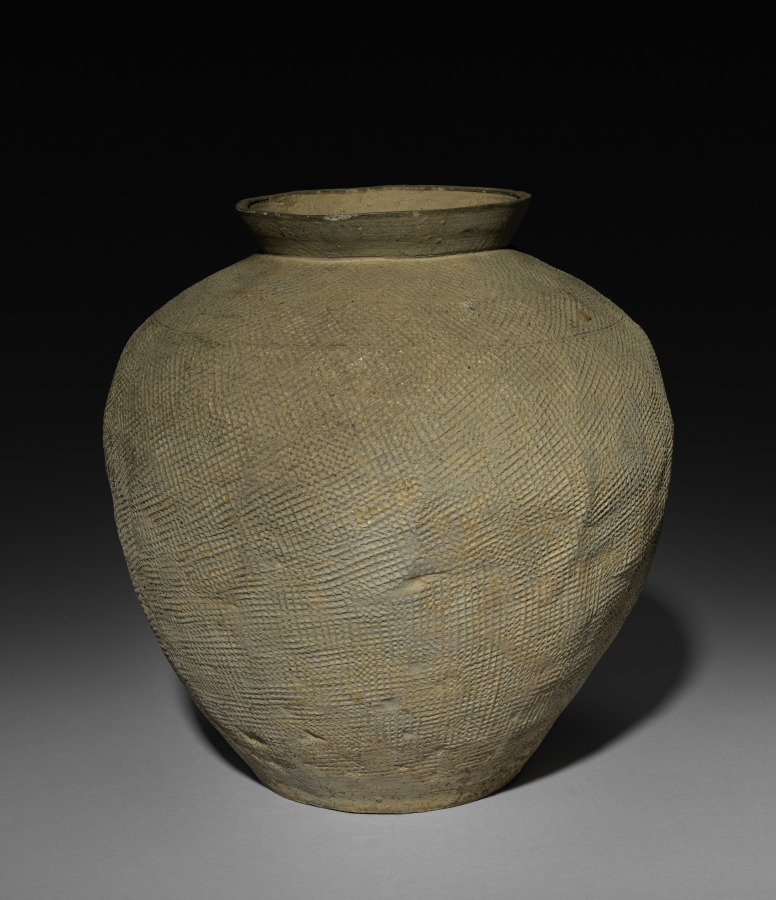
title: Jar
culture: China, Hunan province, reportedly Changsha, Eastern Zhou dynasty (770–256 BCE), Warring States period (475–221 BCE)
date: 481–221 BCE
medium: earthenware with stamped decoration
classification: Ceramic